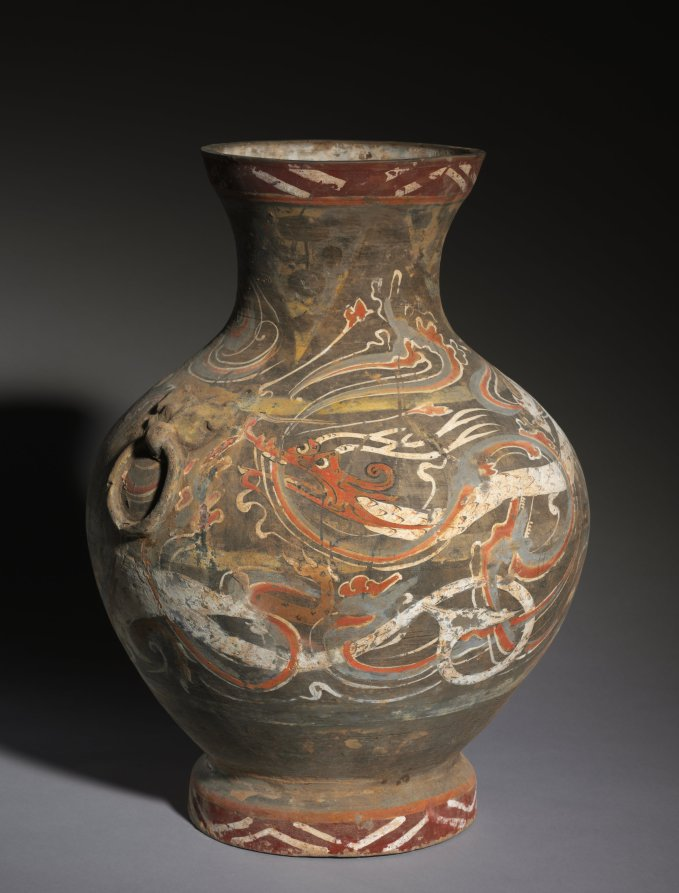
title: Jar (Hu)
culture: China, probably Henan province, Western Han dynasty (206 BCE–8 CE)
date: 202 BCE–9 CE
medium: earthenware with slip and painted decoration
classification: Ceramic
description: Instead of depicting a real landscape, the artist focused on the rhythmic forces of nature and the movement of energy, using the scrolling form as a symbol common to all changes in nature: cloud vapors, waves, and mountains alike. Here a dragon hovers among sweeping scrolls.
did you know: This earthenware wine jar's shape mimics costly bronzes, but the handles have rings that are fixed to the surface of the pot, rendering them useless.